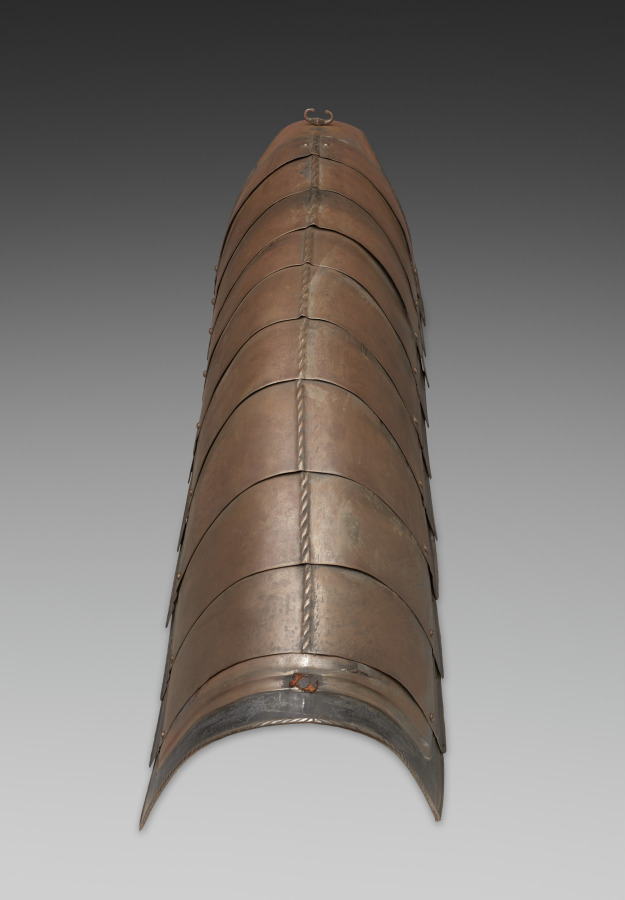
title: Horse's Crinet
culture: Germany, 19th century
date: 1801–1900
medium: steel with black paint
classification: Arms and Armor